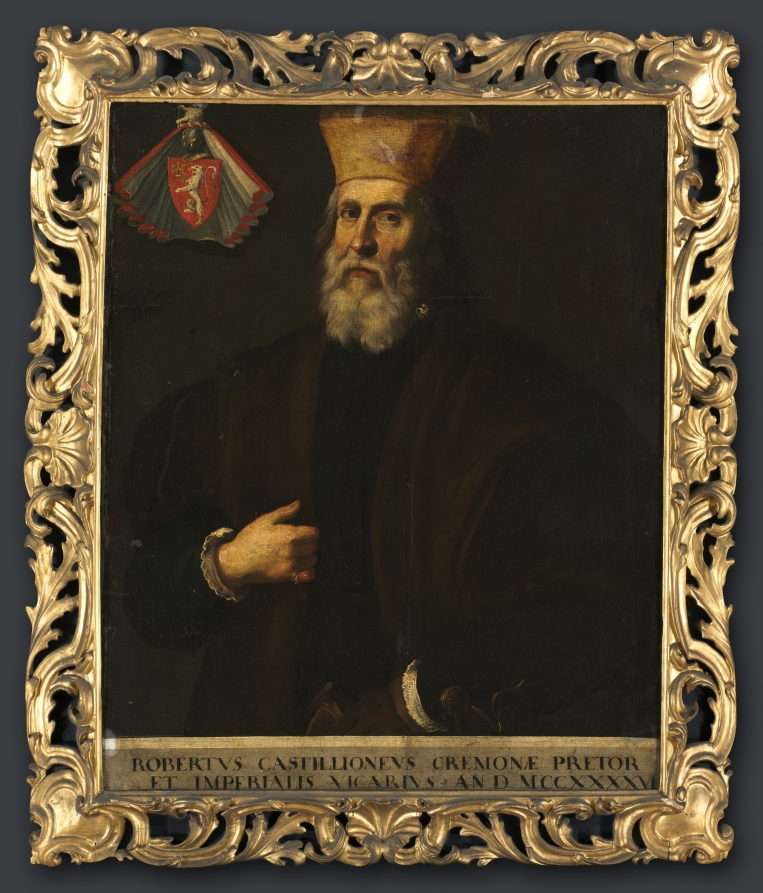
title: Portrait of Roberto Castiglione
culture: Italy, Cremona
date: early 1600s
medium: oil on canvas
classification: Painting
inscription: inscribed at bottom: ROBERTUS CASTILLIONEUS CREMONAE PRETOR ET IMPERIALIS VICARIUS AN D MCCXXXXVI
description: The inscription on the bottom of this painting identifies the sitter of this commemorative portrait as Roberto Castiglione, a magistrate and imperial vicar for the Spanish empire in the 1200s. His identity is further supported by the coat of arms in the upper left. A red shield ornamented by a lion holding a castle with three towers in his right paw, the crest belongs to the Castiglione family, which was primarily based in Milan, but had branches in Cremona as well. His gloved left hand holds a prayer book and the glove for his bare right hand, which holds back the fur trim of his mantle.